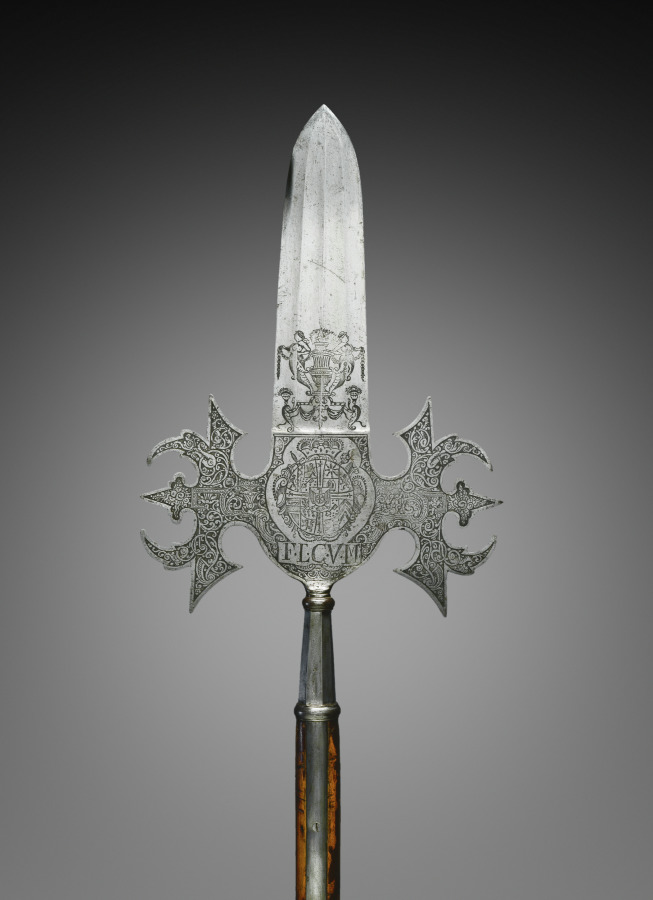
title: Partisan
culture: Germany, 18th century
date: 1729–32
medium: steel, etched, haft broken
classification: Arms and Armor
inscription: Coat of arms and letters F.L.C.V.M. (Franz Ludwig Kurfurst von Mainz)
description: The partisan, a staff weapon with a symmetrical head, was carried by infantry officers and members of princely bodyguards during the 1600s and 1700s. This one is inscribed with the coat of arms and letters F.L.C.V.M for Franz Ludwig Kurfurst von Mainz. Franz Ludwig (1664-1732) held the office from 1729-32.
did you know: Partisans were a favored weapon of palace guards and princely bodyguards; the large flat surface of the head lends itself perfectly for decorative coats of arms.